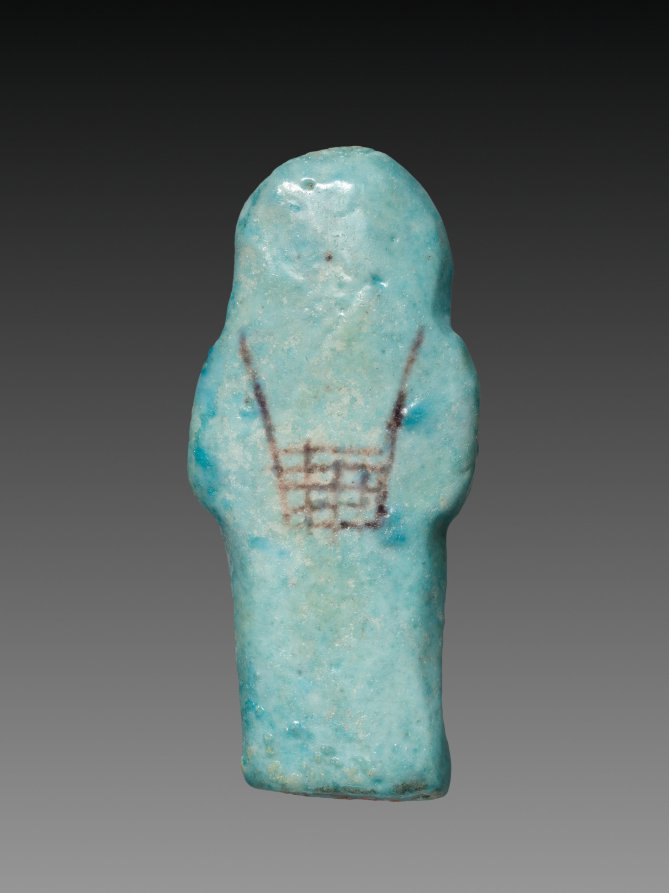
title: Shawabty of Payefadjer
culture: Egypt, Third Intermediate (1069–715 BCE), Dynasty 21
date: 1000–956 BCE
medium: turquoise faience with purple decoration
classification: Funerary Equipment